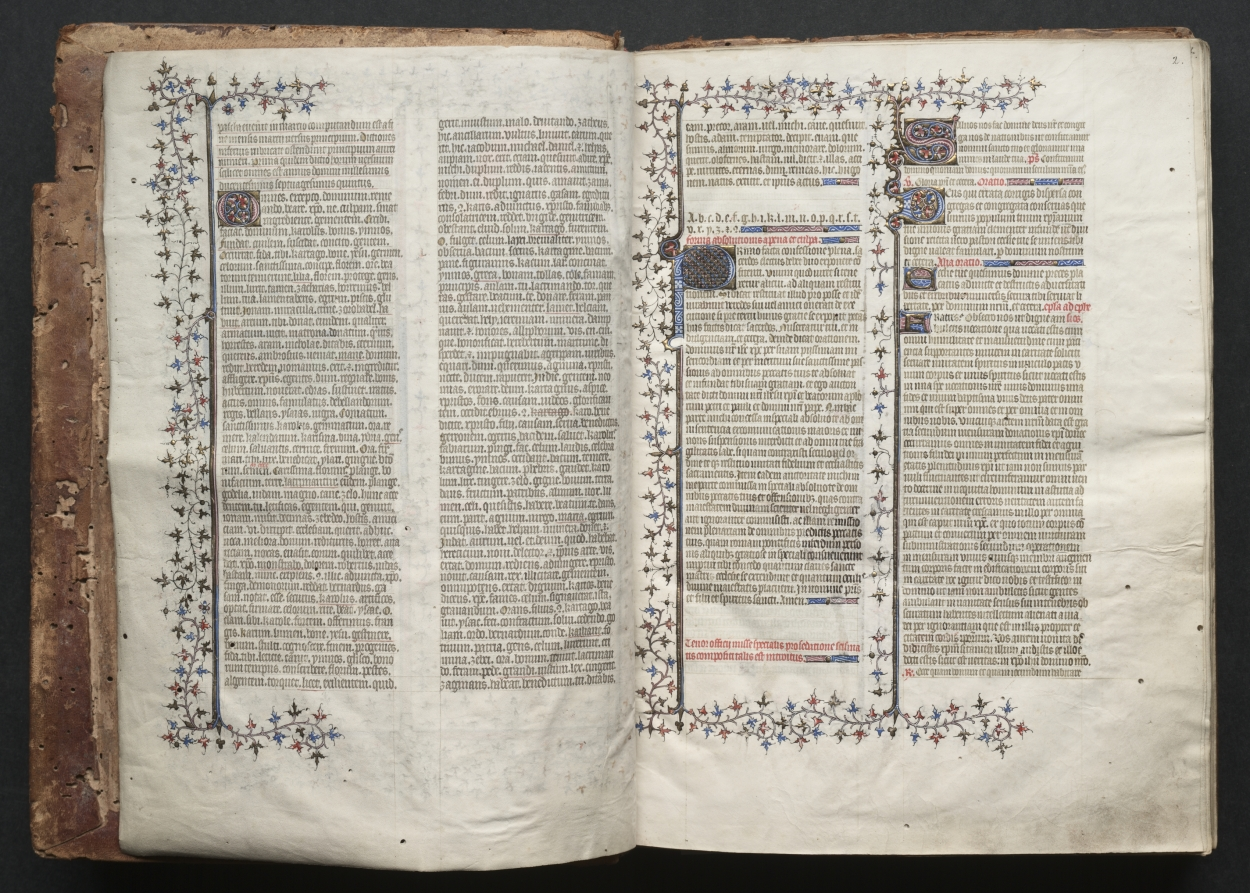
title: The Gotha Missal: Fol. 2r, Text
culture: France, Paris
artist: Master of the Boqueteaux (French)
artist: and Workshop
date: c. 1375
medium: ink, tempera, and gold on vellum; blind-tooled leather binding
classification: Bound Volume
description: The style and quality of this manuscript's decoration is typical of deluxe Parisian books made for aristocratic or royal patrons. Most of the book's decoration appears to be the work of the Master of the Boqueteaux, an artist active at the court of King Charles V (died 1380). His style was apparently shared by a number of book illuminators working in and around Paris. It is very possible that the Gotha Missal belonged to Charles V, but is not provable because the manuscript has no royal portraits and lacks a colophon. Given the book's magnificent decoration, however, it would seem that it was produced for a Valois prince, if not for the king himself. The manuscript receives its name from the German dukes of Gotha, its later owners.